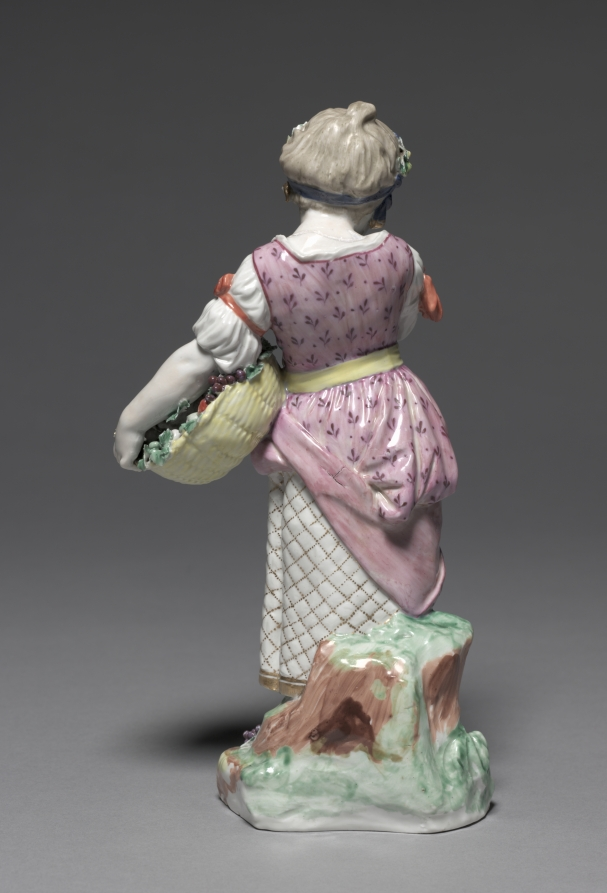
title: Figure of Autumn from the Four Seasons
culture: England, Bristol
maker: Bristol Porcelain Factory (British, 1770–81)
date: c. 1775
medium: hard-paste porcelain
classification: Ceramic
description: The modern notion of childhood as a time of innocence and simplicity emerged during the second half of the eighteenth century. This understanding of adolescence led to numerous depictions of children as personifications of the four seasons. Here autumn is portrayed as a young girl playfully jostling her overskirt as she balances a basket of fruit against her hip. The grapes, plums, and apples filling her basket allude to a plentiful fall harvest.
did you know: Allegorical figures most often decorated a table during the dessert course, providing amusing subjects for conversation.